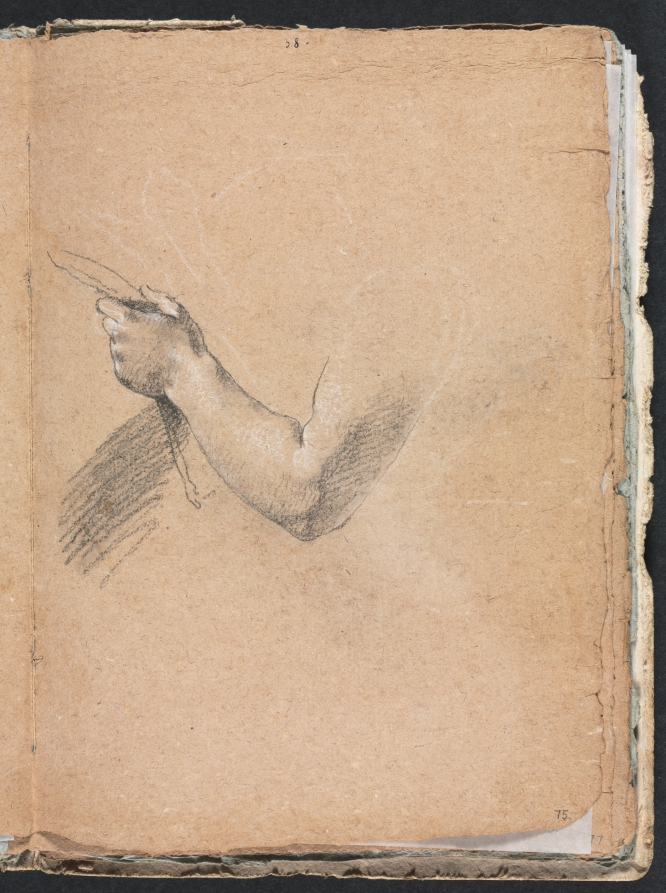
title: Verona Sketchbook: Left arm and hand (page 75)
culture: Italy, 18th century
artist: Francesco Lorenzi (Italian, 1723–1787)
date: 1760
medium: black chalk with white heightening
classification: Bound Volume